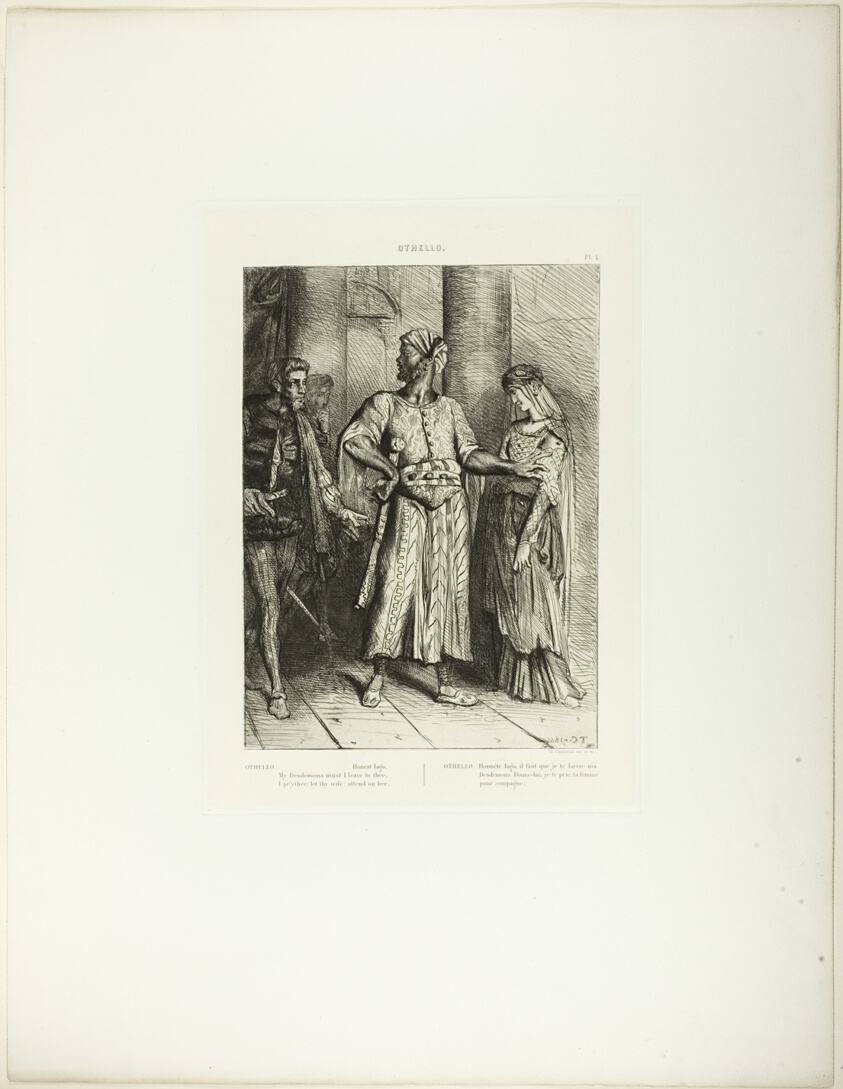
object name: Print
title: Honest Iago, Desdemona Must I Leave to Thee, plate 4 (act 1, scene 3), from Othello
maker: Théodore Chassériau (French, 1819-1856)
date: 1844, printed 1900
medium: Etching, engraving, roulette and drypoint on ivory chine, laid down on white wove paper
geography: France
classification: etching; print; prints and drawing